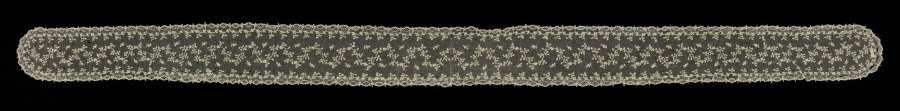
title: Lace Lappet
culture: France, Argentan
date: 1715–74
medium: Linen: needle lace (Point de Argentan)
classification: Lace